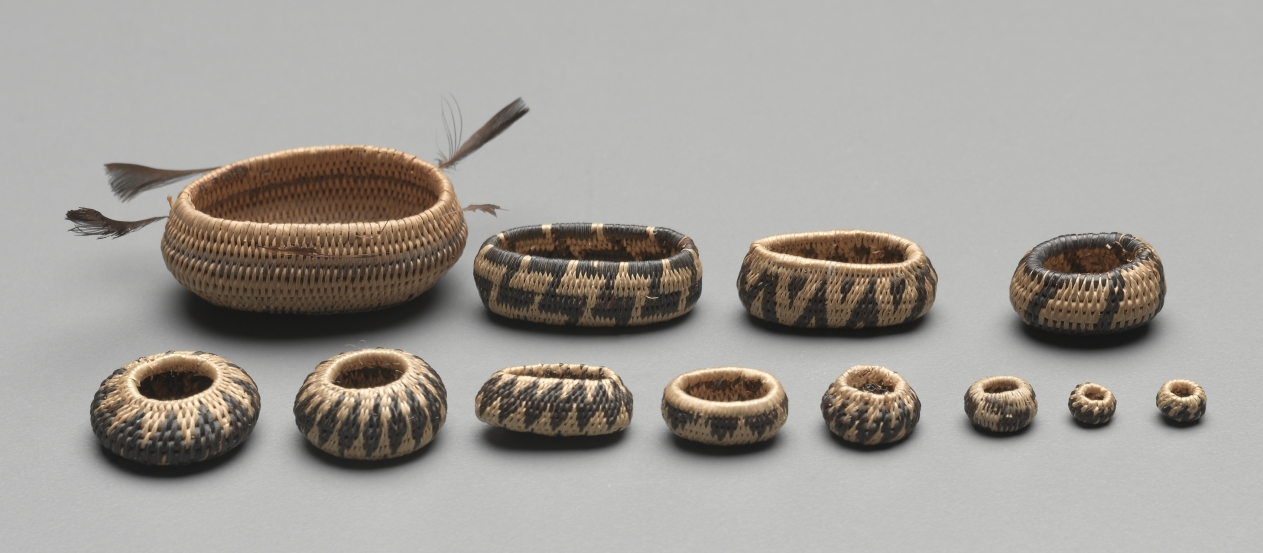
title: Miniature Rhomboidal Basket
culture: California, Pomo, 20th century (?)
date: Early 1900s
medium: coiled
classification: Basketry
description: Miniature baskets were made to demonstrate the basket-maker’s virtuoso skill, and these tiny marvels seem to be no exception—the smallest are just a few millimeters wide but still patterned. For such fine work, dexterity was required as much for preparation of materials as for weaving.